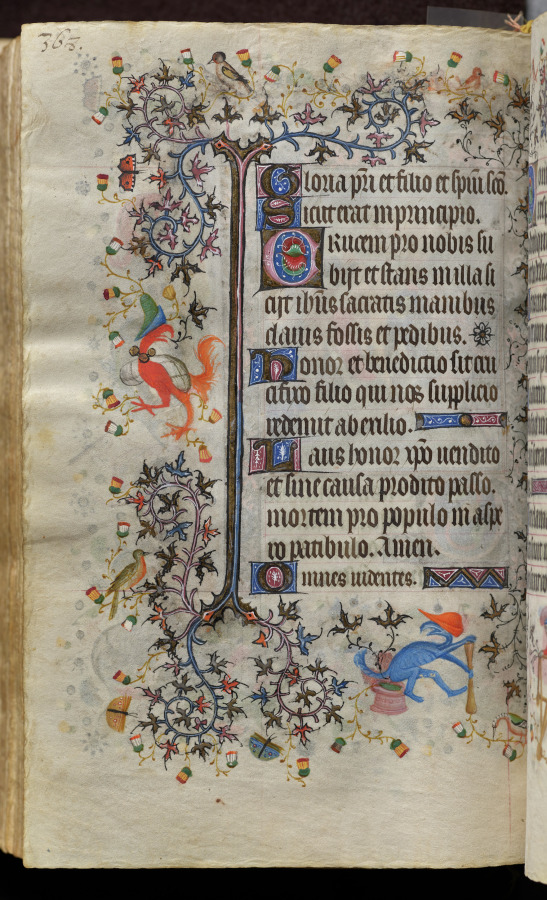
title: Hours of Charles the Noble, King of Navarre (1361-1425): fol. 179v, Text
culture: France, Paris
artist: Master of the Brussels Initials and Associates (French)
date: c. 1405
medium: ink, tempera, and gold on vellum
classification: Bound Volume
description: This precious volume was obviously highly prized by its owner, the French-born King of Navarre, who had his coat of arms painted on no less than twenty folios. Rather than directly commissioning this manuscript from a specific workshop, it seems that Charles the Noble acquired his book of hours -- perhaps ready-made for the luxury market -- while on a trip to Paris in 1404-05. A collaborative effort, six painting styles are evidenced within the pages of this codex, those of two Italians, two Frenchmen, and two Netherlanders. The painter who was responsible for the planning and decoration of the book, and who produced seventeen of the large miniatures, was a Bolognese artist known as the Master of the Brussels Initials. His principal assistant, responsible for most of the borders, was a Florentine who signed his name "Zecho" da Firenze on folio 208 verso.